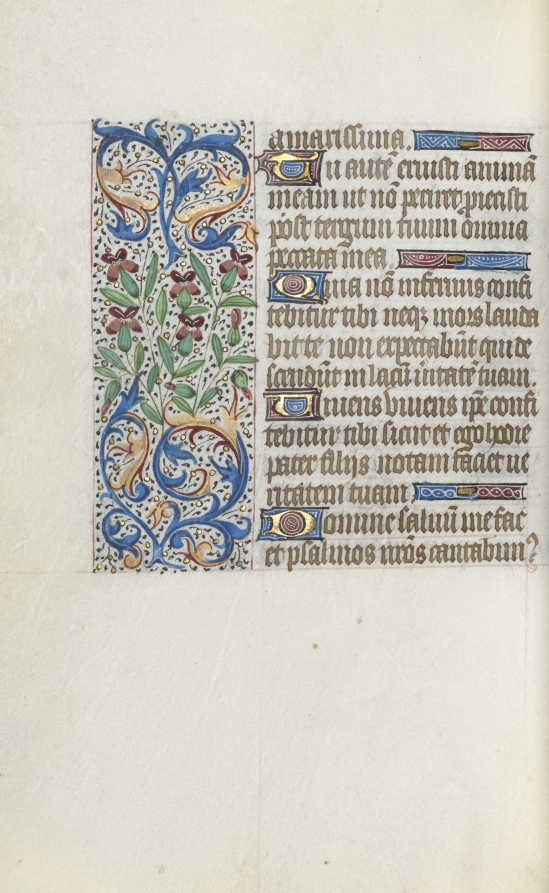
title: Book of Hours (Use of Rouen): fol. 140v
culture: France, Rouen, 15th century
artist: Master of the Geneva Latini (French, active Rouen, 1460–80)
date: c. 1470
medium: ink, tempera, and gold on vellum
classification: Bound Volume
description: In the late 1400s and early 1500s Rouen was an established and important center of book production. The city’s cathedral had a wealthy chapter that spent large sums of money to commission books and to maintain its extensive library. The stationers and booksellers would have likely been concentrated in or near the cathedral precinct. This artist, named after a manuscript now in Geneva, was Rouen’s principal illuminator during the second half of the 1400s.